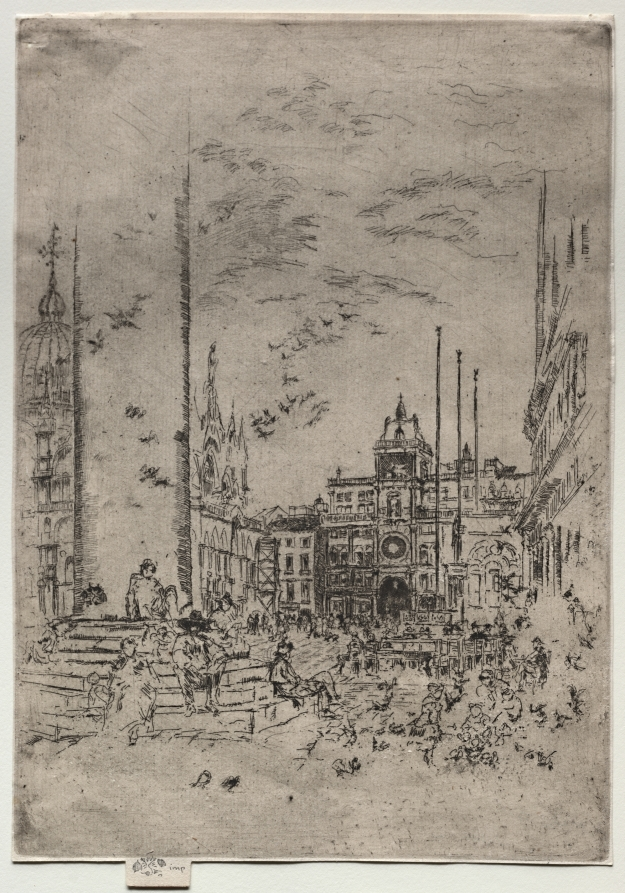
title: The Piazzetta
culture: America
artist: James McNeill Whistler (American, 1834–1903)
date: 1880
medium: etching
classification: Print